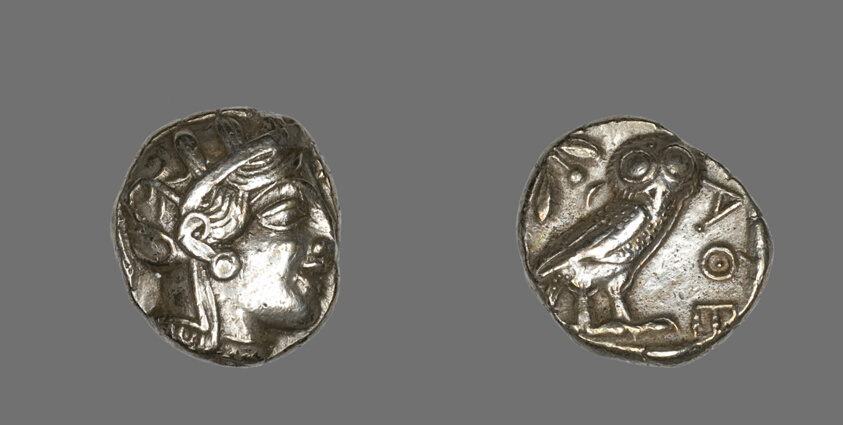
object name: Coin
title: Tetradrachm (Coin) Depicting the Goddess Athena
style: archaic (greek)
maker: Greek, minted in Athens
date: about 490 BCE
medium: Silver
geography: Athens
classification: coin; ancient art